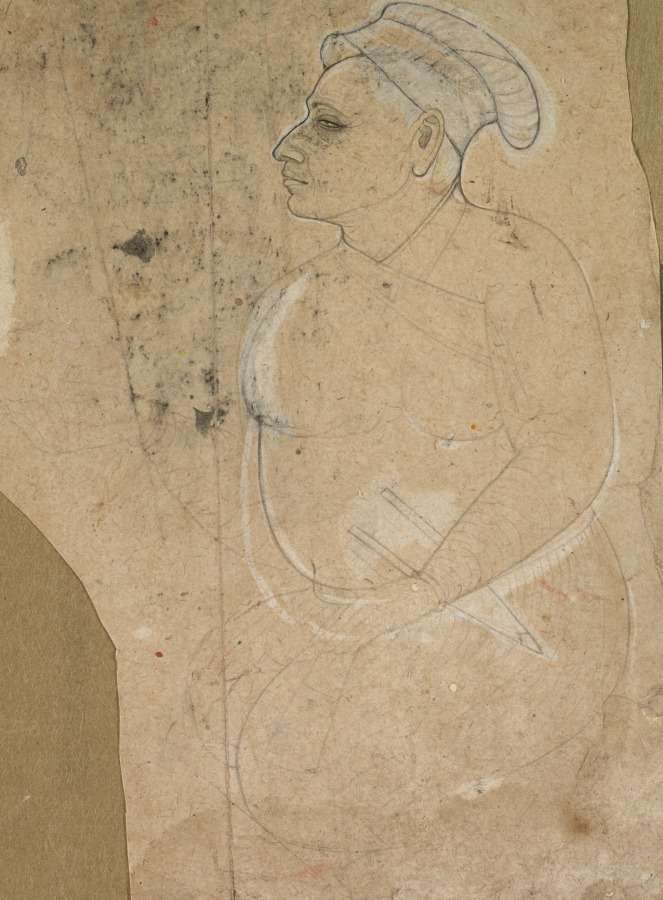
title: Portrait of a man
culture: Northern India, Pahari kingdoms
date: c. 1700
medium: Gum tempera on paper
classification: Drawing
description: This sensitive portrait survives as a fragment, part of a study for a larger painting. This man’s Mughal tunic, with a katar dagger tucked into the sash, indicates that he is a noble, probably Hindu, because the tunic is tied under the left arm. The gesture of his right hand—just a ghost of an indication—and slightly parted lips suggest that he is making a request. His upright posture reveals an inner strength and dignity despite the affliction to his eyes, which seem no longer able to see.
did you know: The subject of this drawing might be a posthumous portrait of the blind king Sital Dev of Mankot (reigned 1630–1660), who died several decades before this drawing was made.